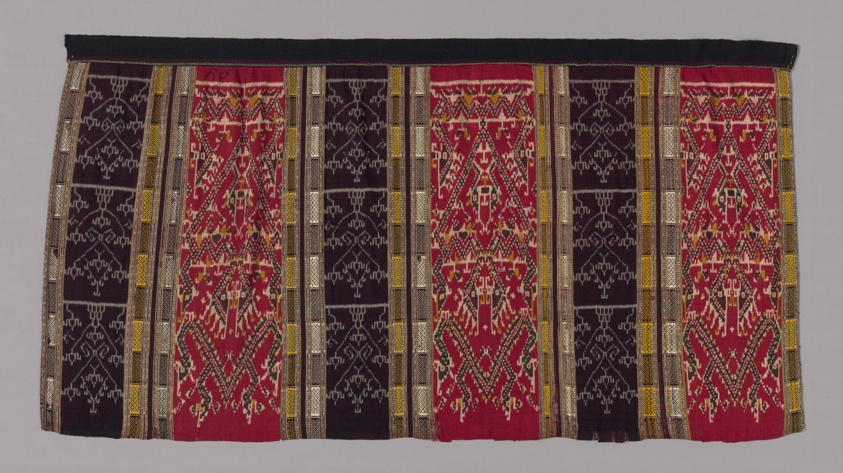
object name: Textile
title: Sin Mi (Woman's Funerary Skirt)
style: laotian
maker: Tai Neua; Laos, Ban Neua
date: Late 19th century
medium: Silk and cotton, plain weave with supplementary patterning wefts; resist dyed; edged with cotton and silk, plain weave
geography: Laos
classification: textile; weaving - printed; weaving